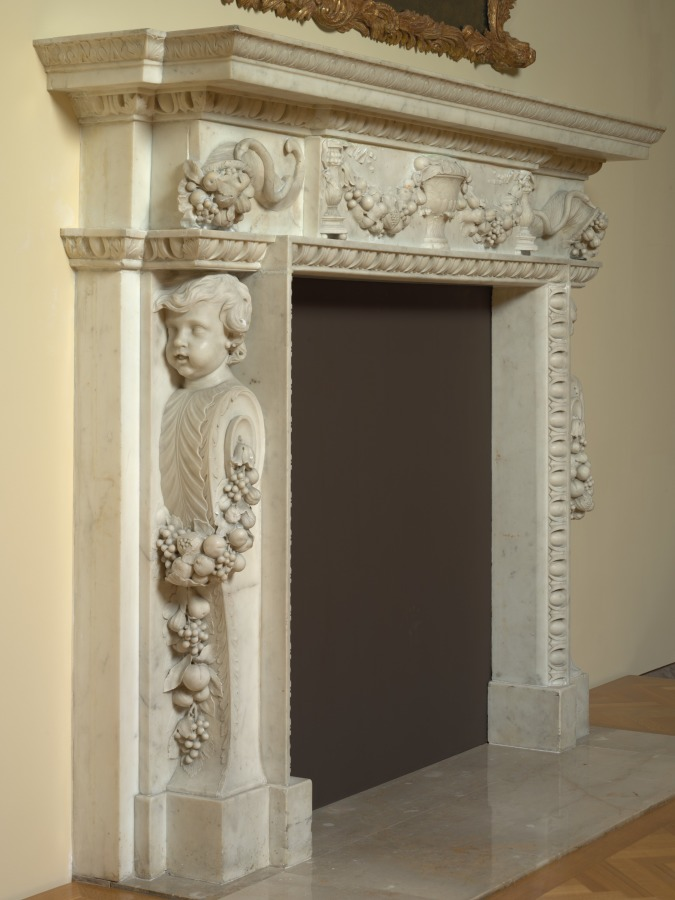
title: Mantel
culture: England, 18th century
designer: after Inigo Jones (English, 1573–1652)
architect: probably by William Kent (British, 1685–1748)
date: c. 1730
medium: marble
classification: Furniture and woodwork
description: The cornucopias and scroll-shaped brackets capped by the bust of the youthful Roman god, Mercury, were inspired by the work of Inigo Jones, one of the first British architects of great renown. The mantel was originally installed in Wanstead House, formerly located on the outskirts of London. Working opposite the architect, Colen Campbell (1676–1729), William Kent completed the interior decoration of the estate and likely produced this mantel as well. When Wanstead House was pulled down in 1822, the Duke of Hamilton purchased the chimney piece and three others from Wanstead House to display in his own home near Glasgow, Scotland.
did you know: Here the presence of the Roman god of trade and abundance (Mercury) within the decorative scheme of this mantel alludes to prosperity and bounty.